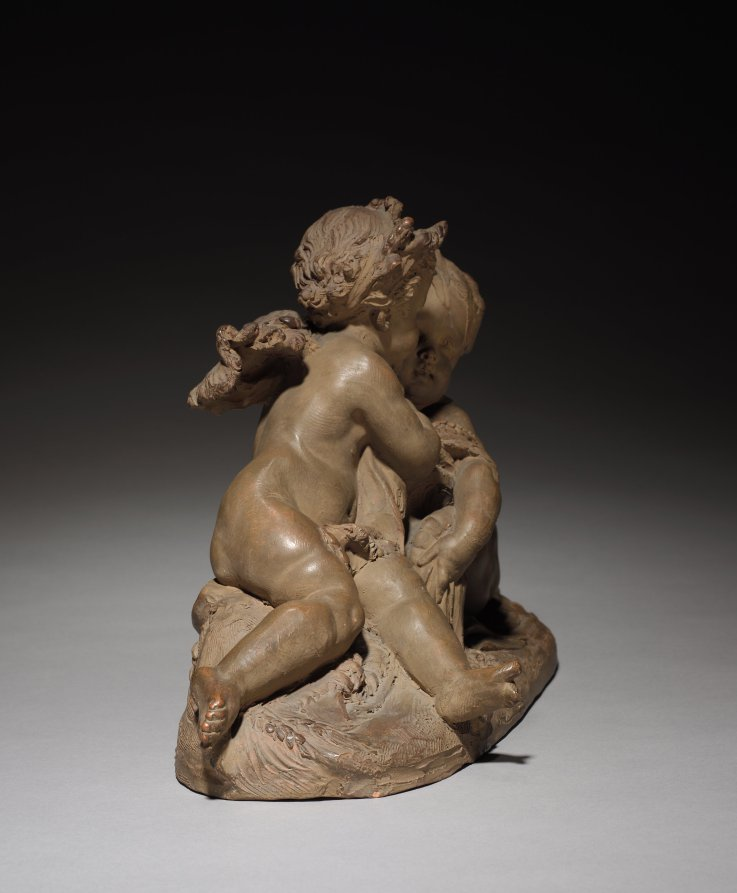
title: Putti Representing Earth and Water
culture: France, 19th century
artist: Albert-Ernest Carrier-Belleuse (French, 1824–1887)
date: 1865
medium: terracotta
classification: Sculpture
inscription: Signed near right corner: "A. Carrier (letter 'E' smeared)"; inscribed in pencil on upper surface of wooden base: "#2268" and "Henschel"; inscribed in pencil on bottom of wood base: "2268" and "Made-in-France"